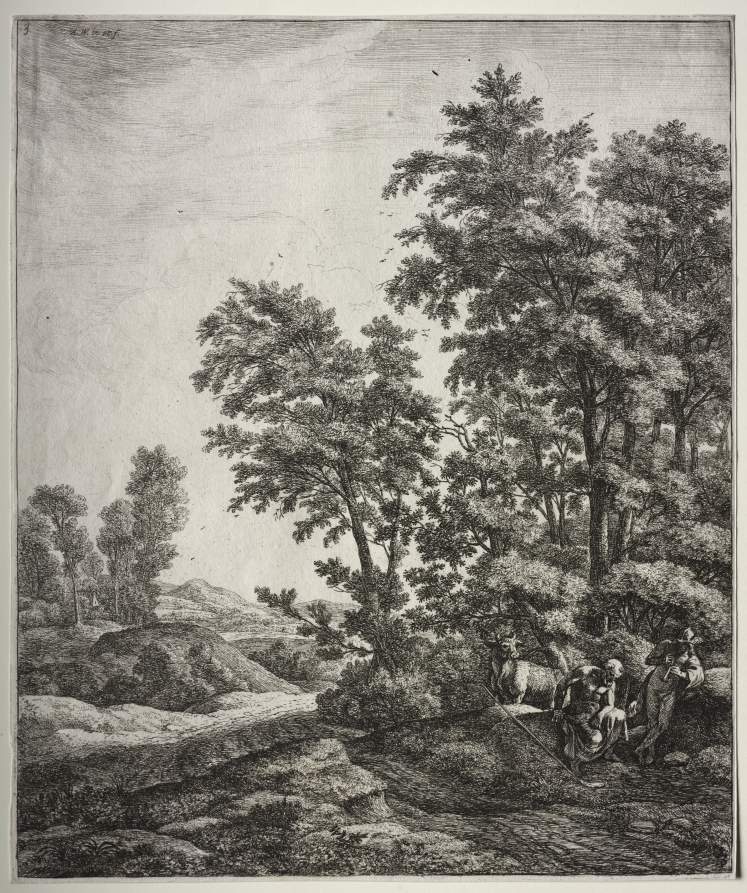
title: Six large upright landscapes with scenes from Ovid's Metamorphoses: Mercury and Argus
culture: Netherlands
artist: Anthonie Waterloo (Dutch, 1609/10–1690)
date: 1640–90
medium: etching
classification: Print